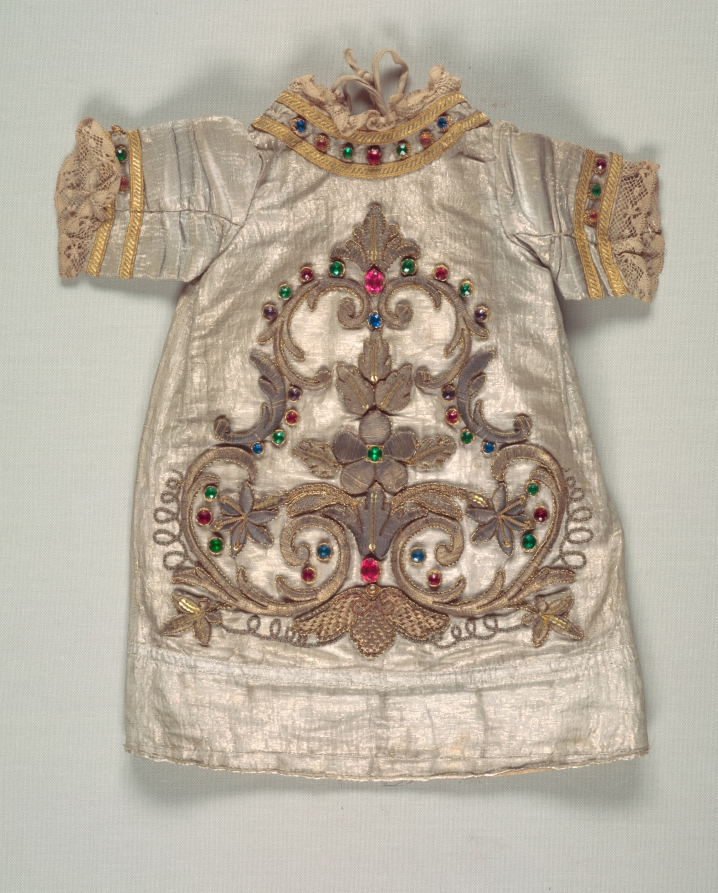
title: Baby's Robe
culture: Spain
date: 1600s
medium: plain weave silk with silver metal thread weft; embroidered with gold and silver metal thread, spangles, and colored glass stones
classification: Garment